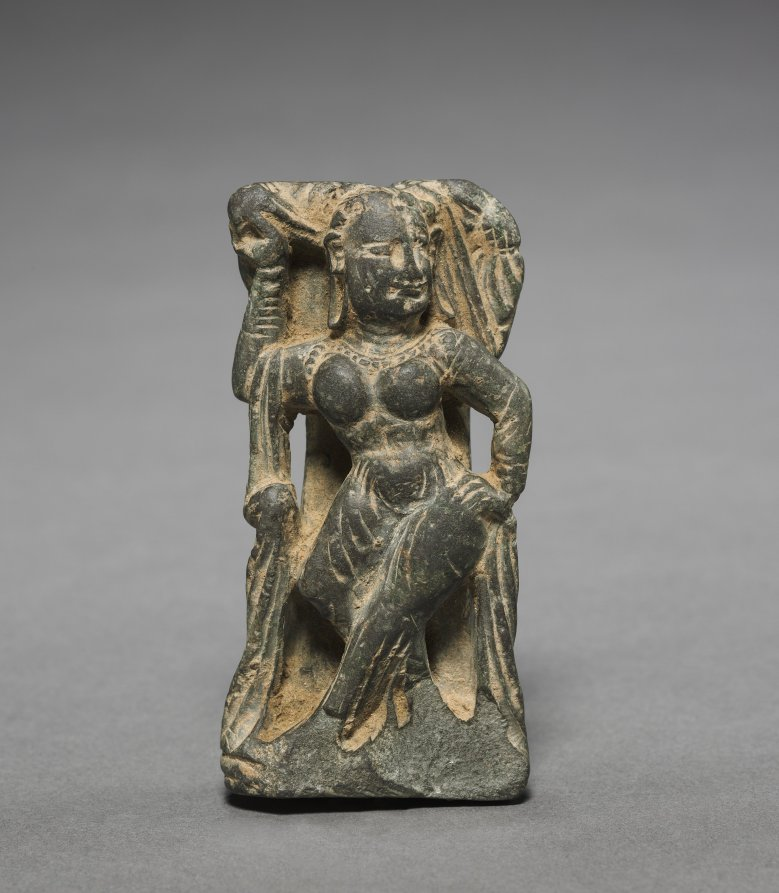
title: Shalabhanjika (Woman and Tree)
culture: Northern India, Kashmir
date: 300s–400s CE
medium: gray steatite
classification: Sculpture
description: The full carving of a flowering tree on the back of this figurine indicates that she is a figure of a nature divinity who personifies the life-giving qualities of the sap that envigorates the tree and causes it to flower. These figures are sometimes called shalabhanjika, "she who breaks the tree," probably because her fertile properties are so powerful that it causes the tree to fruit so heavily that the branches break.